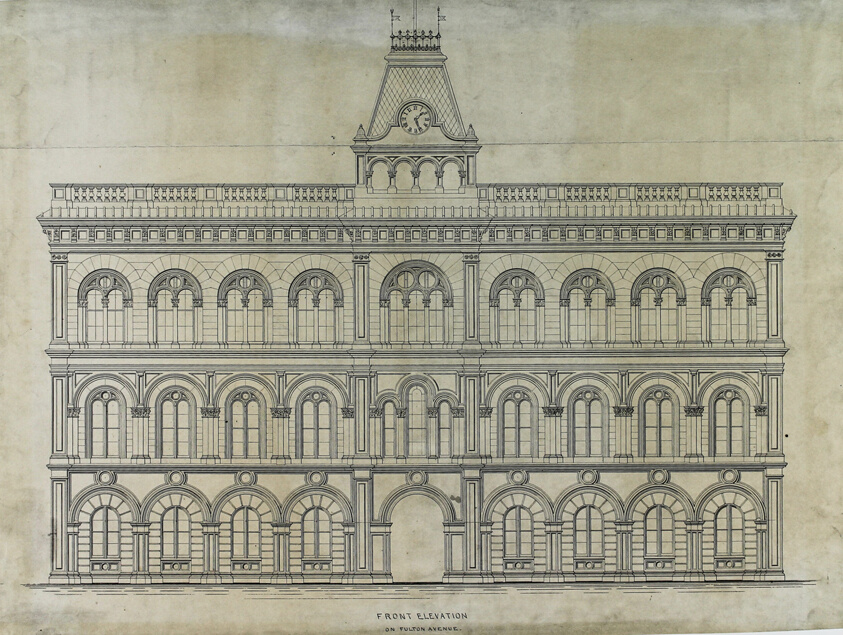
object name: Architectural Drawing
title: Kings County Courthouse Competition, Chicago, Illinois, Elevation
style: 19th century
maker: Peter Bonnett Wight (American, 1838–1925)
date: c. 1869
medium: Ink on paper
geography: Brooklyn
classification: presentation drawing; architectural drawing; architecture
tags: Chicago, architecture